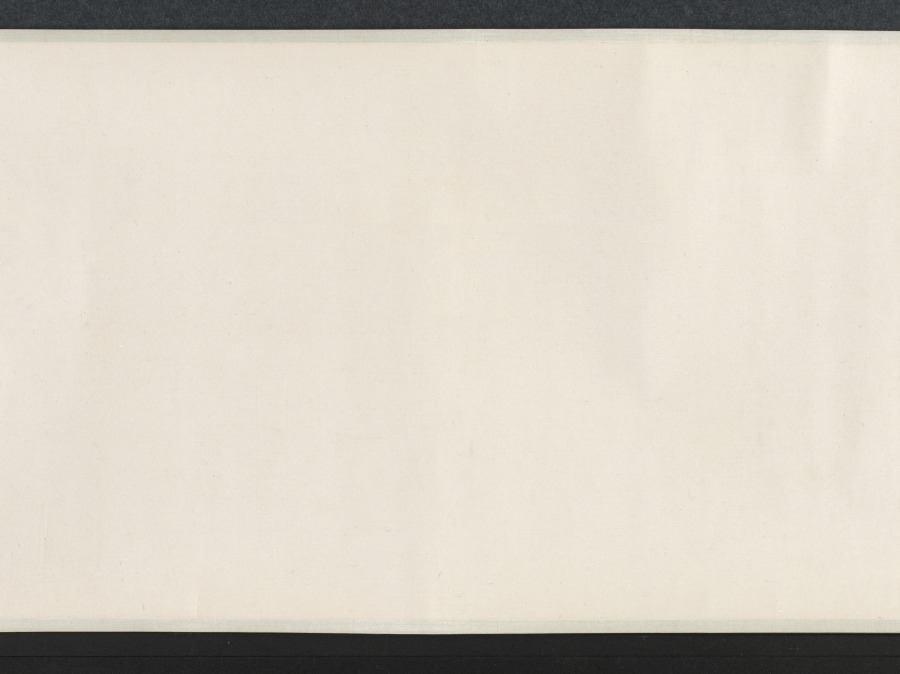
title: Nine Songs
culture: China, Yuan dynasty (1271-1368)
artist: Zhang Wo (Chinese, active c.1336–after 1364)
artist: Chu Huan (Chinese, active 1361)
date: 1361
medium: handscroll; ink on paper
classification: Painting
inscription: 7 colophons and 47 seals: 1 colophon, dated 1361, and 28 seals of Chu Huan 褚奐 (active c. 1361); 1 colophon, dated 1785, and 1 seal of Lu Shihua 陸時化 (1714-1779); 2 seals of Lu Yü-ch'ing (18th c.); 1 colophon, dated 1935, of Ye Gongchuo 葉恭綽 (1881-1968); 1 colophon, dated 1935, of Wu Hufan 吳湖帆(1894–1968); 1 colophon, dated 1938, and 1 seal of Wang Tongyu 王同愈 (1856-1941); 1 colophon, dated 1941, of Wu Huayuan 吳華源 (1893-1972); 1 colophon, dated 1942, and 9 seals of Xu Bangda 徐邦達 (1911–2012); 1 colophon, dated 1942, of Lang Jingshan 郎靜山 (1892-1995); 1 colophon, dated 1944, of Tang Yun 唐雲 (1910-1993); 6 seals of Wang Jiqian [C.C. Wang] 王季遷 (1907–2003).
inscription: Text of The Nine Songs written by Chu Huan at the end of each section.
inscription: 右離騷九歌圖，宋龍溟居士李公本，淮南張渥叔厚所畫妙絕當世。家藏請予書其辭目識于左。至正二十一年辛醜三月旦河南褚奐記。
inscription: Colophon by Lu Shihua 陸時化 (1714–1789): This scroll is fortunate to have been handed down from collections of the right people. Now, after 500 years, its condition is as good as when it was painted. I acquired this from Mr. Shen Guiyu [1673-1769], the President of the Board of Rites. The label is in his handwriting when he was 95 years old. I submit that Chu Huan (t. Shiwen) of the Yuan Dynasty was a native of Qiantang. His "seal" and li writings are in the style of Wu Rui. For example, in [Chu Kuei's] Ming ji lu [A list of masterpieces] is recorded the stele commemorating the restoration of the prefectural school of Kun-shan, the text of which was composed by Yang Weizhen in the twenty-first year of Zhizheng [1361]; and the calligraphy as well as the title in li style was by Chu Huan, who was at that time an assistant judge of the prefecture of Haining in the circuit of Hangzhou. Zhang Wo's zi is Shuhou (叔厚). His literary name is Zhen Qisheng (贞期生). According to [Gu Ying's] Yu shan cao tang ya jii, he liked to paint in the bai-miao or the "pure delineation" style after the method of Li Longmian [Li Gonglin 李公麟], which finds no peer among the ancient masters. This is agreed upon [by Pei Ch'iung] in his Qing jiang zhi who praised [Zhang Wo] as being quite learned and well-versed in many branches of the arts, especially figure painting. Recorded by Lu Shihua [The mountain dweller], listening to the pine, in the twelfth month of the yisi year [1785].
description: Painted in the baimiao, or fine-line drawing style, this ancient work demonstrates the literati’s use of abstract calligraphic brushwork for self-expression. The subject of the “Nine Songs”—songs associated with shamanistic rituals in the ancient Chu kingdom—had traditionally provided artists with myths and legends that they could explore and reinterpret in their own works.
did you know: Divided into eleven sections, the scroll contains illustrations by painter Zhang Wu followed by a transcription of the relevant verse by calligrapher Chu Huan.